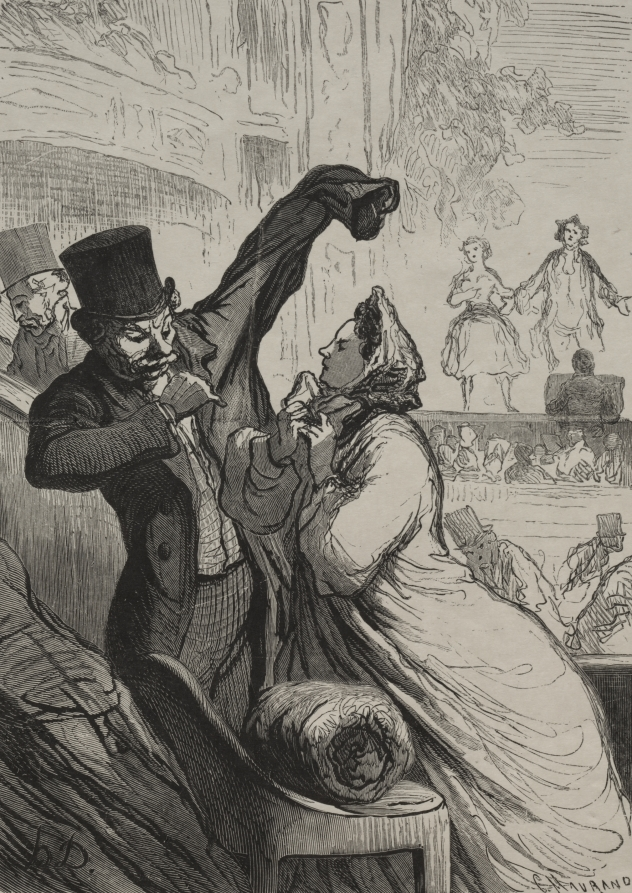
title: The Theatre: The Last Scene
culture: France, 19th century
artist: Honoré Daumier (French, 1808–1879)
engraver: Charles Maurand (French, 1824–1904)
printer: François Louis Schmied (Swiss, 1873–1941)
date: 1862, printed 1920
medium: wood engraving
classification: Print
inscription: Lower margin, in pencil: 65/75 ; red stamp: FLS